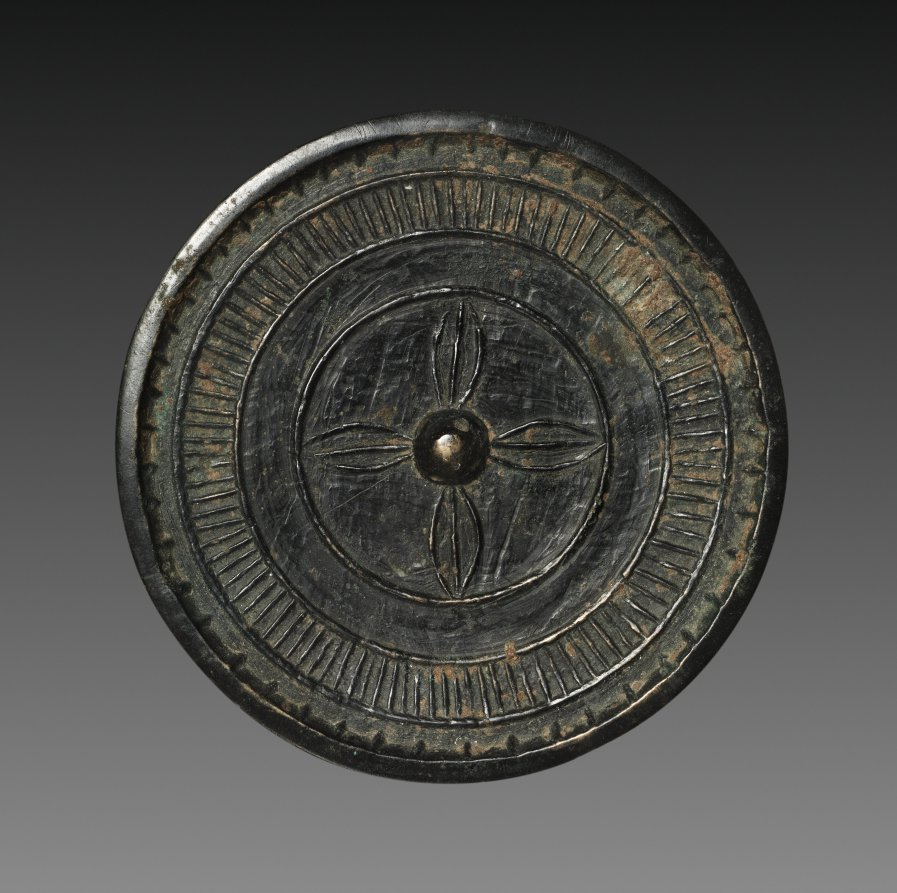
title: Mirror with Four Leaves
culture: Eastern Anatolia or Northern Mesopotamia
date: 1100s–1200s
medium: bronze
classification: Metalwork